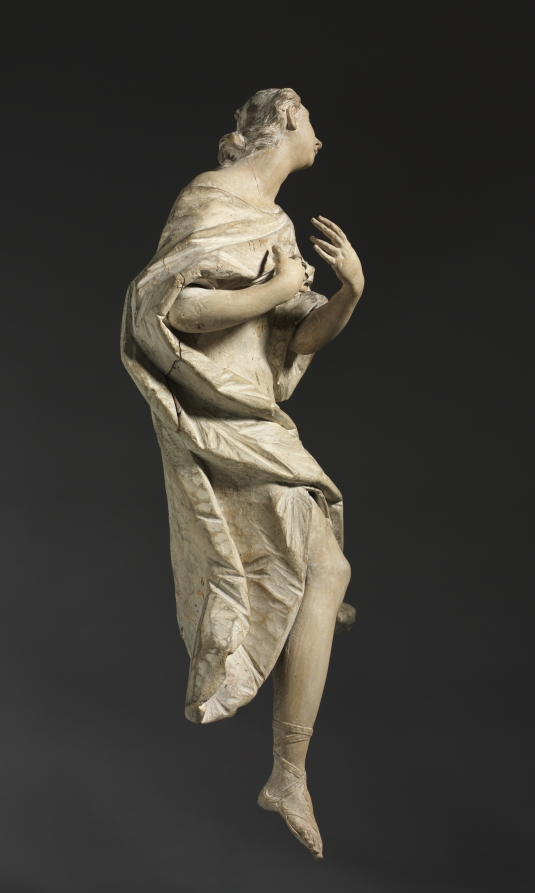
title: Kneeling Angel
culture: Germany, Munich, 18th century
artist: Ignaz Günther (German, 1725–1775)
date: c. 1760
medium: gessoed and painted wood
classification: Sculpture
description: This angel, and another now in the Philadelphia Museum of Art, were probably originally placed on either side of a tabernacle—a structure designed to hold the consecrated bread and wine of the Eucharist—on an altar in a Christian church or private chapel. The angels would originally have had wings, and the now plain surface of the sculpture would have been painted or gilded. Ignaz Günther was among the most sought-after carvers of religious sculpture in southern Germany. His virtuoso skill is particularly evident here in the angel’s pious expression and elegantly formed hands and feet.